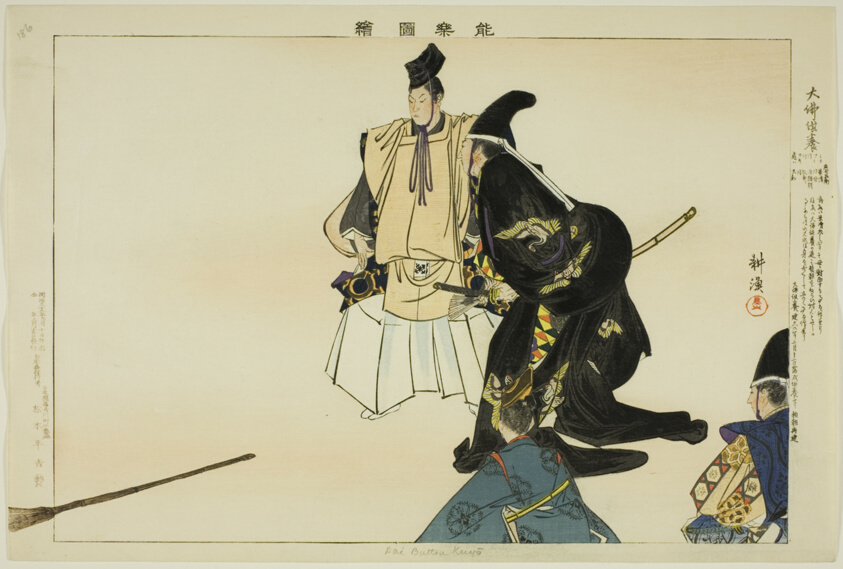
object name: Print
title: Daibutsu-kuyo, from the series "Pictures of No Performances (Nogaku Zue)"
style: Japanese (culture or style)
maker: Tsukioka Kogyo; Japanese, 1869-1927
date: 1898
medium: Color woodblock print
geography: Japan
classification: woodblock print; print; asian art